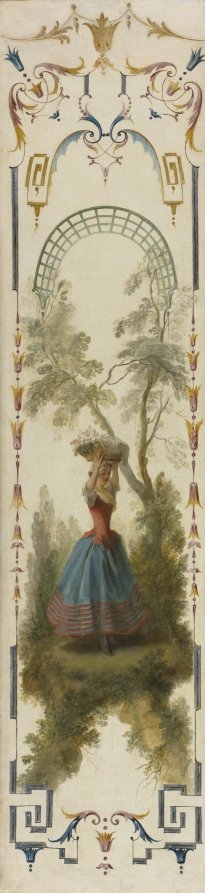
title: Horticulture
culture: France, 18th century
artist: Nicolas Lancret (French, 1690–1743)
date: c. 1723–1727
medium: oil on canvas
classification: Painting